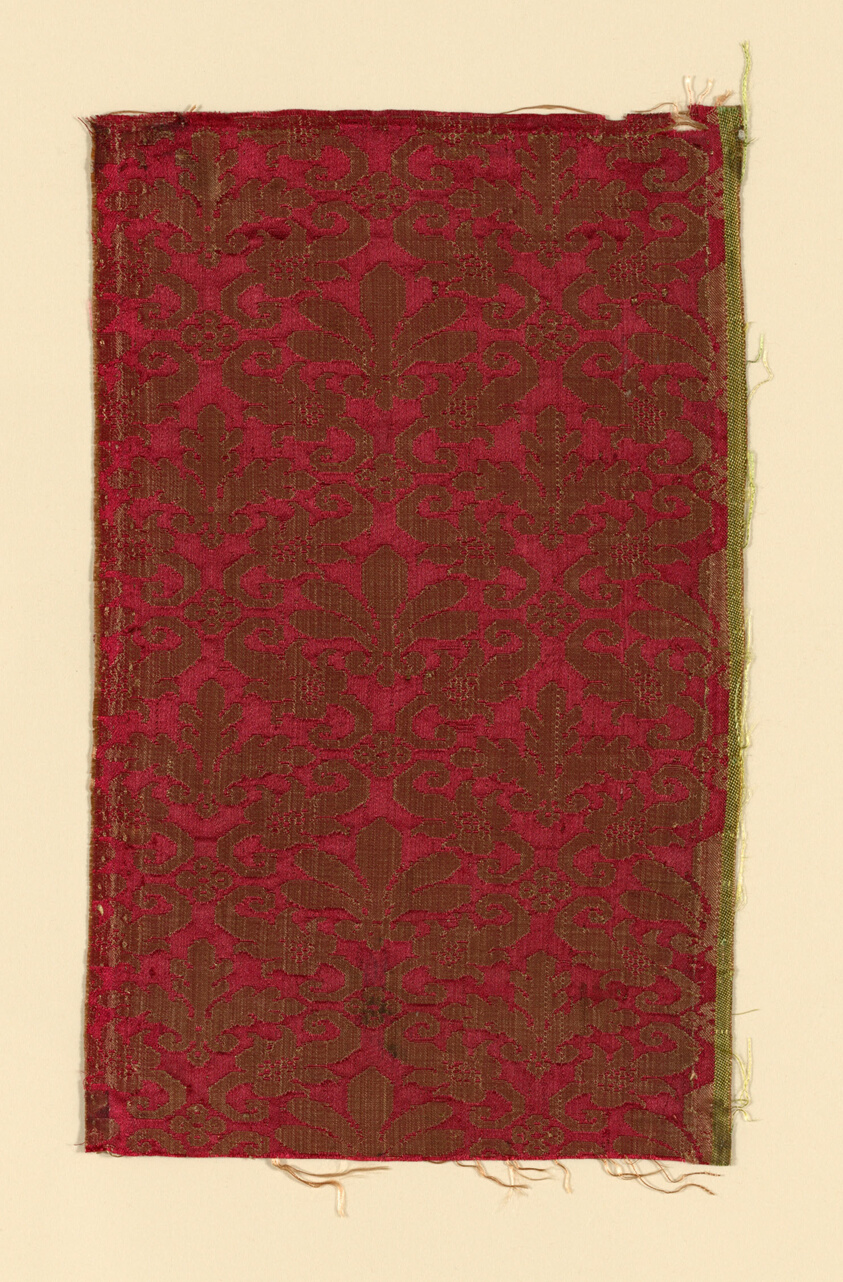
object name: Textile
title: Fragment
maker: Italy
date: 1575/1600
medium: Silk, 4:1 satin damask weave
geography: Italy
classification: textile; weaving